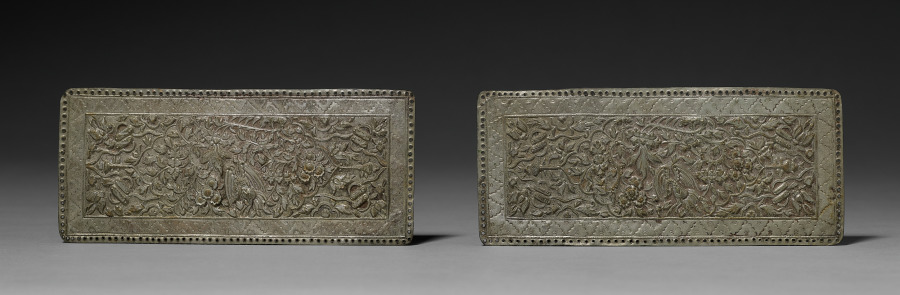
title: Pillow-end Plate Pair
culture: Malaysia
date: 1800s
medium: white metal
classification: Metalwork